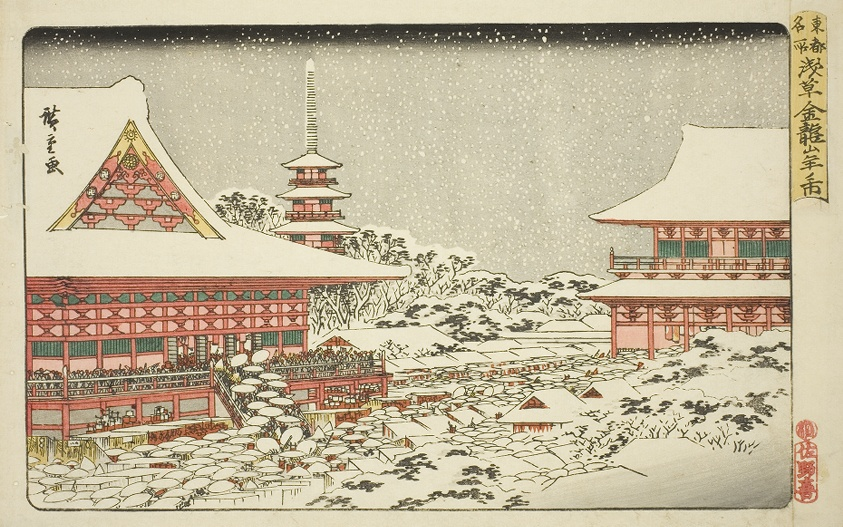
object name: Print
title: Year-end Fair at Kinryuzan Temple in Asakusa (Asakusa Kinryuzan toshi no ichi), from the series "Famous Places in the Eastern Capital (Toto meisho)"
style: Japanese (culture or style)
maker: Utagawa Hiroshige 歌川 広重; Japanese, 1797-1858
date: c. 1835/38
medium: Color woodblock print; oban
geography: Japan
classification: woodblock print; print; asian art